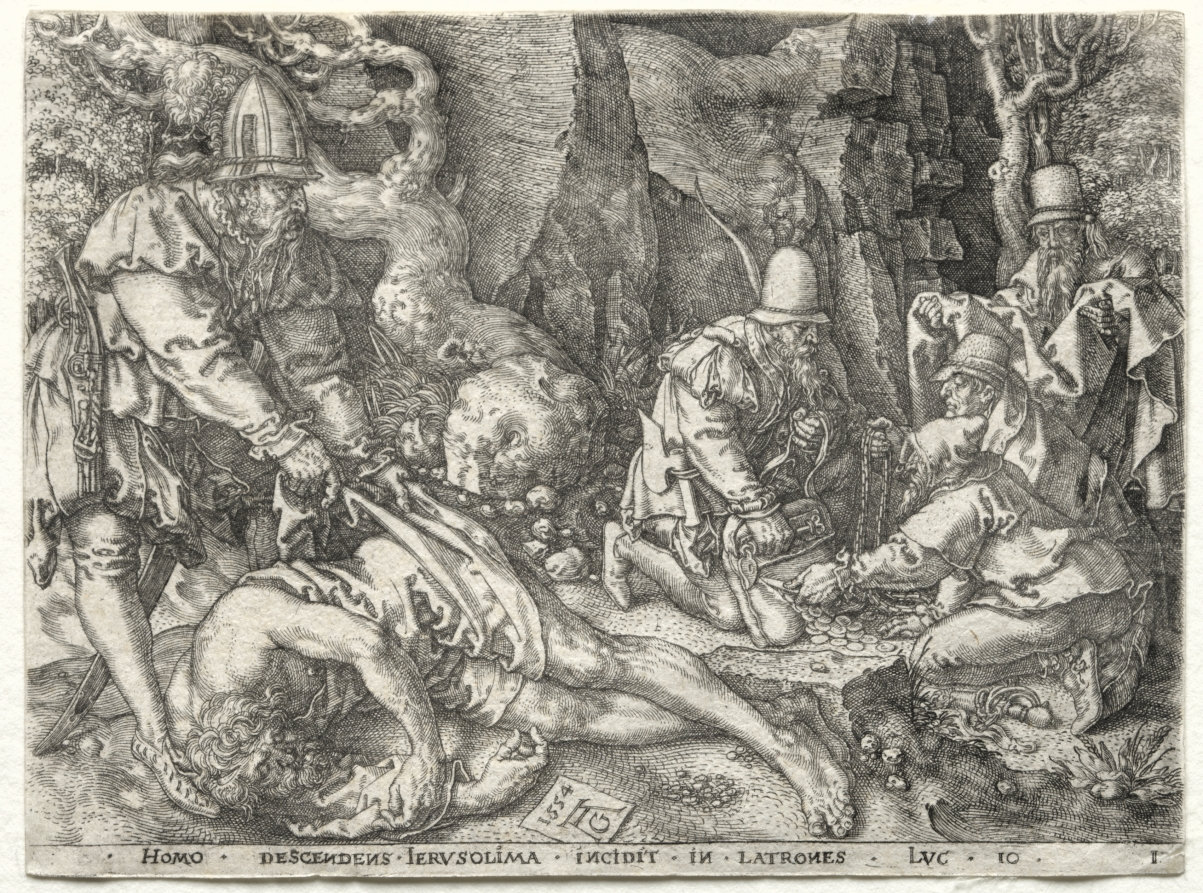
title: The Parable of the Good Samaritan: The Robbers Attacking the Travelers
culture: Germany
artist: Heinrich Aldegrever (German, 1502–1555/61)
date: 1554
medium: engraving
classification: Print